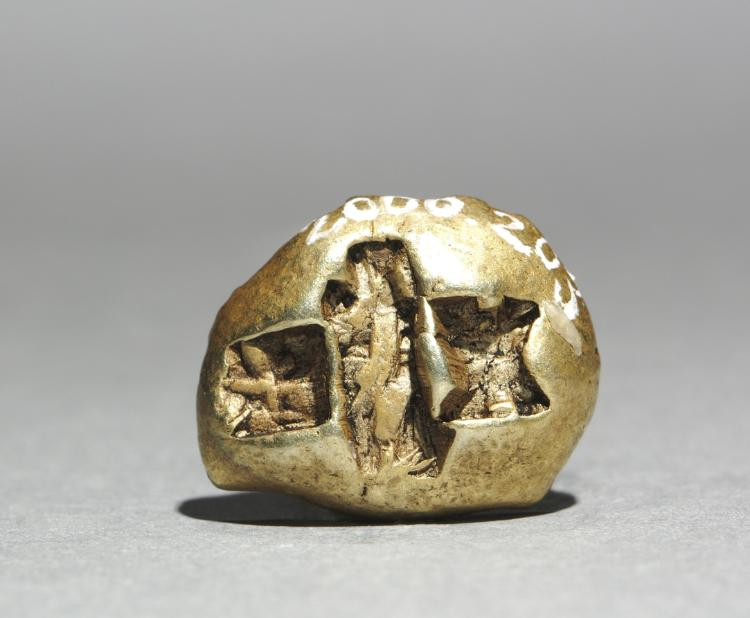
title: Stater: Three incuse punches (reverse)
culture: Greek, minted at Miletos (Ionia)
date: 600–550 BCE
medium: Electrum (gold-silver alloy)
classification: Coins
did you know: Many early Greek coins are made from electrum, a naturally occurring alloy of gold and silver.